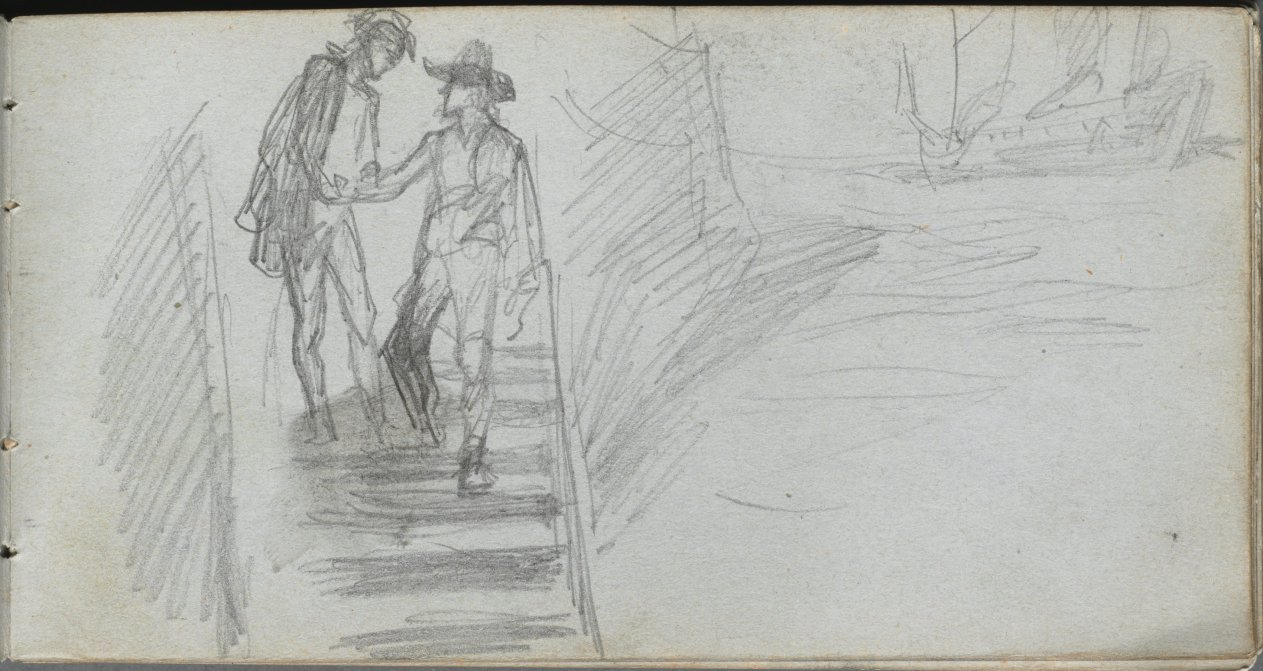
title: Sketchbook, page 64: Figures on a Stairway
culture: France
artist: Ernest Meissonier (French, 1815–1891)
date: c. 1860s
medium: graphite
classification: Bound Volume